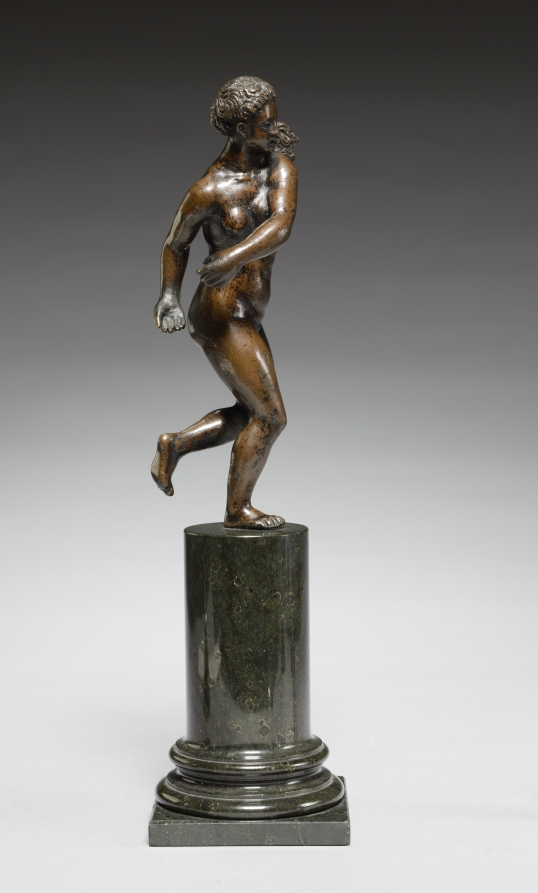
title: Thetis Running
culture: Italy, Ravenna, 16th century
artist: workshop of Severo da Ravenna (Italian, c.1496–c.1543)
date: c. 1527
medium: bronze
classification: Sculpture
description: The complex, corkscrew-like twist of the figure’s body around a central axis indicates that this work was meant to be seen and admired in the round. Producing a sculpture of a body in motion posed a challenge for Renaissance artists, and complex compositions like this were often adapted from prints and paintings. The pose of this bronze statuette may have been inspired by a print representing the Greek sea goddess Thetis. Thetis was courted by the gods Zeus (Jupiter) and Poseidon (Neptune), but was eventually married to the mortal Peleus; the Greek hero Achilles was their son. In the print, Thetis pours water from a jug held at her hip and her upraised foot rests on a large shell, both referencing her role as sea goddess. The statuette’s lack of identifying attributes encourages the viewer to focus instead on the figure’s graceful spiraling form, and the sculptor’s skill in creating a convincing sense of movement.